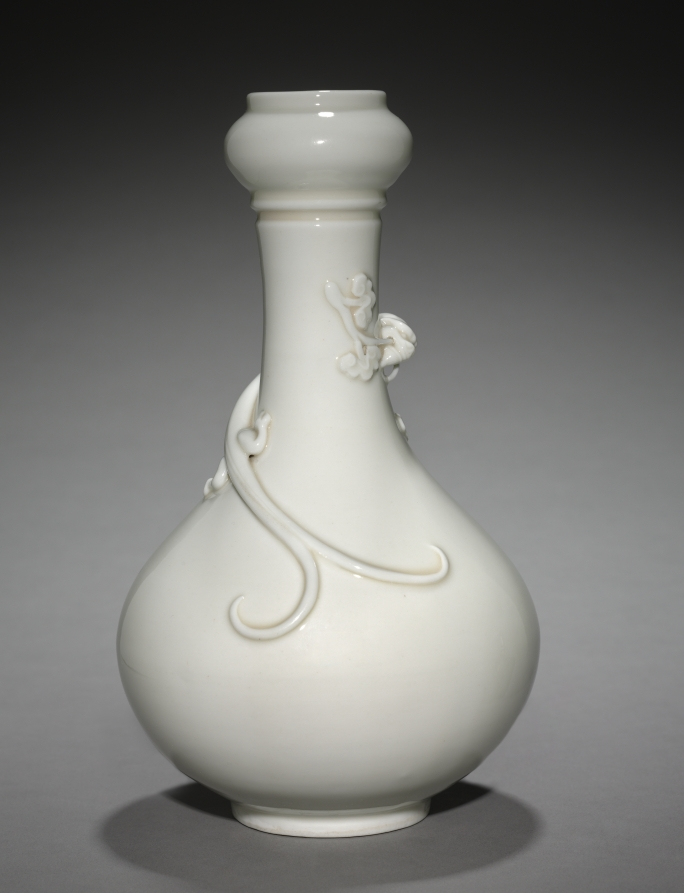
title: Bottle-shaped Vase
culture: China, Qing dynasty (1644-1911), Kangxi reign (1662-1722)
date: 1662–1722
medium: porcelain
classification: Ceramic